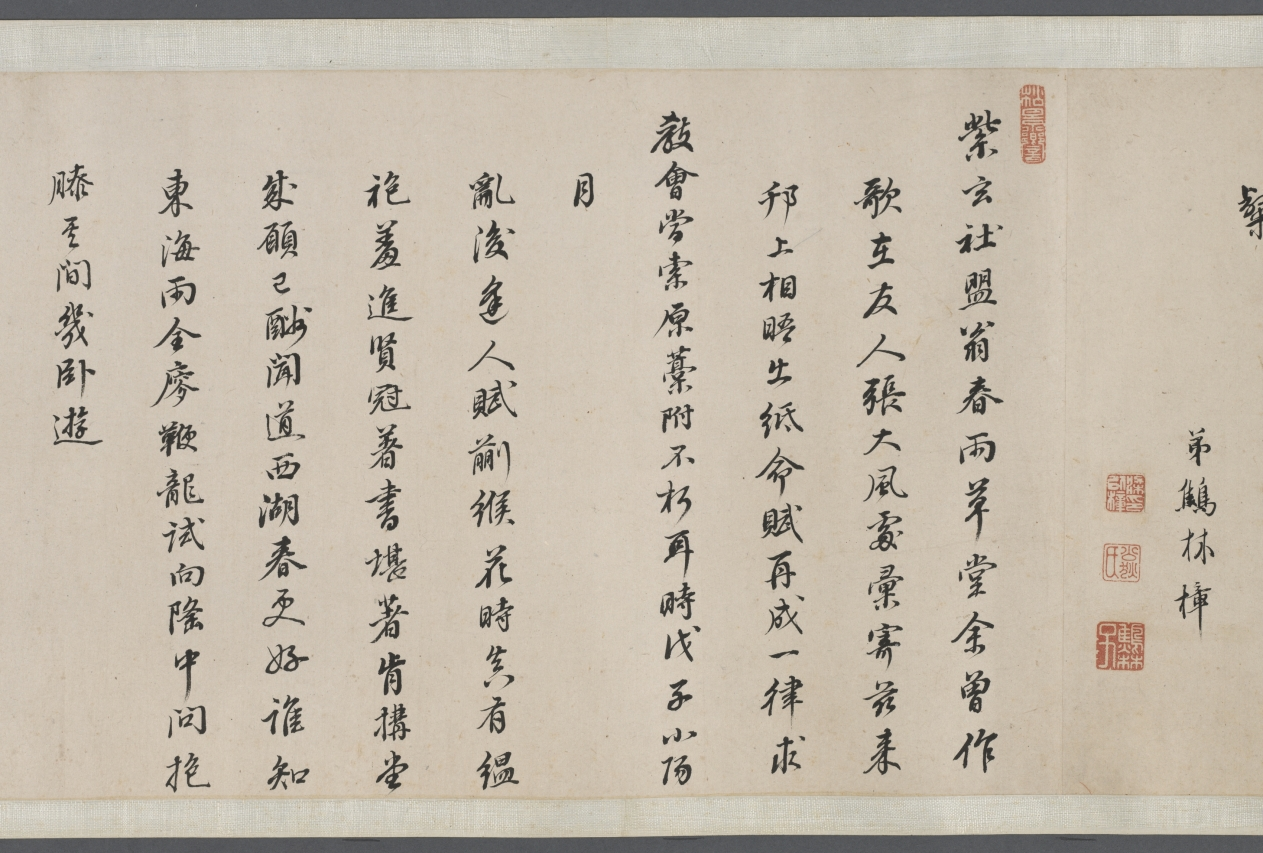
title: Spring Rain Thatched Hut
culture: China, Qing dynasty (1644-1911)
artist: Wang Jianzhang (Chinese, active 1621–1662)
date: 1650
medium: handscroll, ink on paper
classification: Drawing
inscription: Title by Wu Zhiying 吳芝瑛 (1868–1933), dated 1910.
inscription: 春雨草堂圖。庚寅仲春，為紫玄社兄畫於若耶溪上。 仲初王建章。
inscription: 12 colophons by Gong Weiliu’s 宮偉鏐 (1611–1680) contemporaries: Fang Gongqian 方拱乾 (1596–1667, jinshi of 1628); Jiang Cai 姜埰 (1607–1673); Liang Yizhang 梁以樟 (1608–1665); Du Shaokai 杜紹凱 (also named Du Jie 杜岕, 1617–after 1689), dated 1648; Zhao Kaixin 趙開心 (d. 1663), dated 1647; Zhao Erbian 趙而忭 (d. 1658); Yu Yaoguang 余耀光, dated 1649; Yao Quan 姚佺, dated 1648; Chen Taisun 陳台孫 (b. 1611, jinshi of 1640); (Monk) Shao 韶; Du Zhujin 杜祝進; and Tang Shi 唐時.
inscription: 此研田莊居士王建章為先太史紫元公所作春雨草堂圖也。居士字仲初，明崇禎間人，與先太史及惲香山相友善。喜畫佛像，自謂不讓李公麟。山水祖述董源，筆力雄健，有不可羈勒之概。香山稱其墨有五采，非世人所知。然性廉重，非同志不輕落筆，人得其寸圖尺縑，必相與忻賞，如獲蜼彝兕敦，非人世間物也！見先太史筆記，此圖寫雨景，而氣韻生動，勃勃於不能止。每一展覽，覺滿紙雲烟，墨瀋猶濕，如寫吾先人胸中未盡之邱壑也。圖後題詠，多一時名手，想見文采風流之盛。迄今二百餘年，舊德先疇，遺風未沫。吾子孫其永寶之，如與吾先人接謦咳於一堂，為感思之助，其敢作圖畫觀乎！同時香山亦有圖佚去己久，不知異日能為延津之合否。壬申長夏本昂重裝敬識。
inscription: Collectors' seals including: Gong Ben'ang 宮本昂 (1821–1874); Lian Qian 廉泉 (1868–1932); Wu Zhiying 吳芝瑛 (1868–1933)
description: With its striking simplicity, this painting captures the pure serenity of a private garden in the moist atmosphere of a spring morning on a small river. Painted in the style of Ni Zan, Wang Jianzhang dedicated this work to his patron-friend Gong Weiliu (1611-1680). Gong retired from government service after the fall of the Ming dynasty and constructed a garden-retreat at his native home in Taizhou, Jiangsu province. He invited scholars and poets from his literary society to contribute writings of his estate, which are here mounted together with the painting in this scroll.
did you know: Gong Weiliu, the owner of the estate portrayed here, had received his prestigious jinshi degree in 1643, but his official career was thwarted by the collapse of the Ming dynasty the following year.